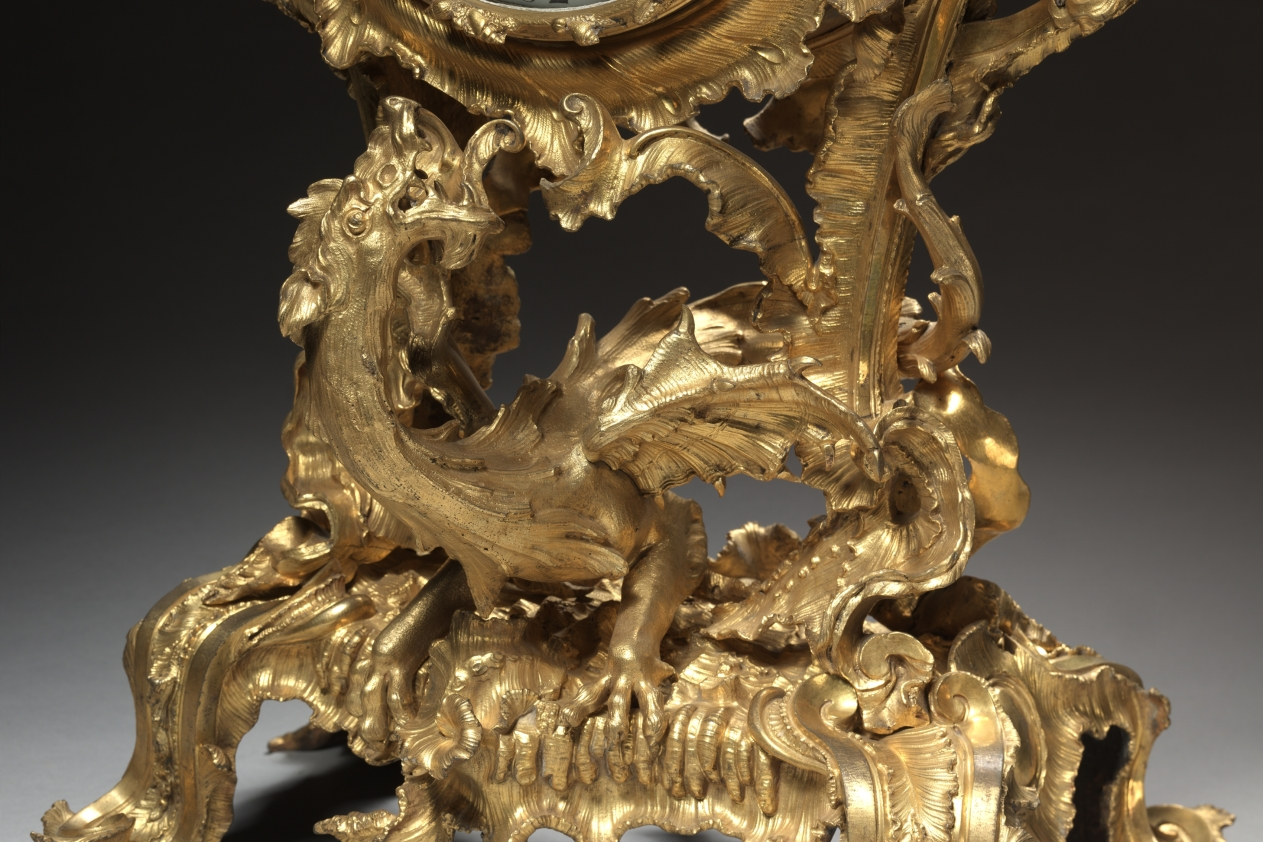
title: Clock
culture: France, 18th century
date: c. 1750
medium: gilt bronze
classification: Furniture and woodwork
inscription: on clock face: JOUARD A PARIS; engraved on plaque attached to back of clock face: Jouard Paris.